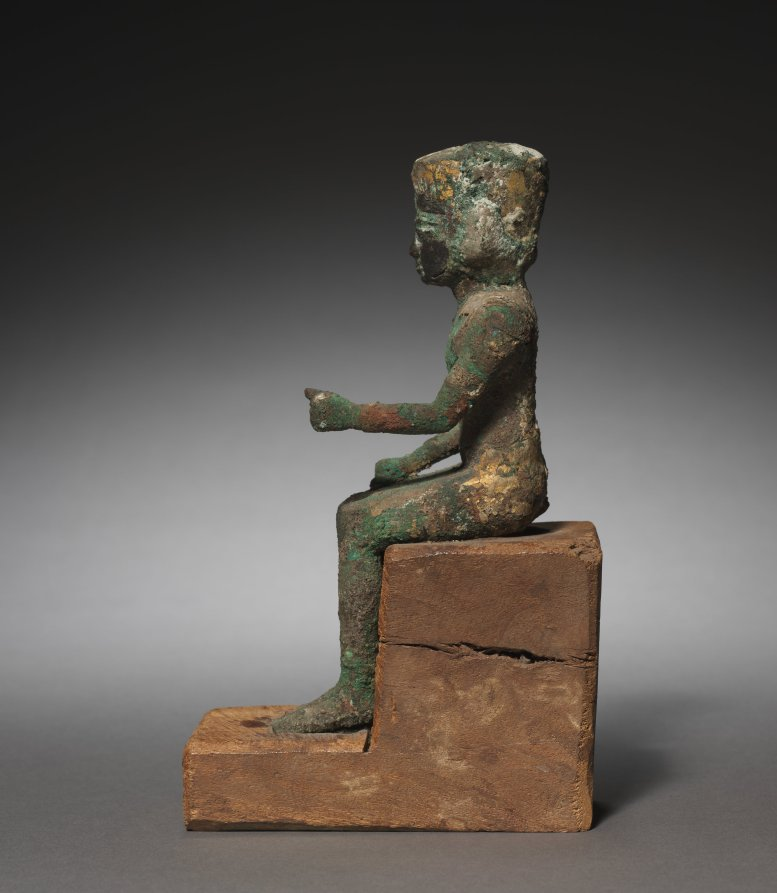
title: Statuette: Seated Amen-Ra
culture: Egypt, Late period (715–332 BCE), Dynasties 25–26(?)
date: 715–525 BCE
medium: bronze and black copper, gilded and inlaid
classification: Sculpture